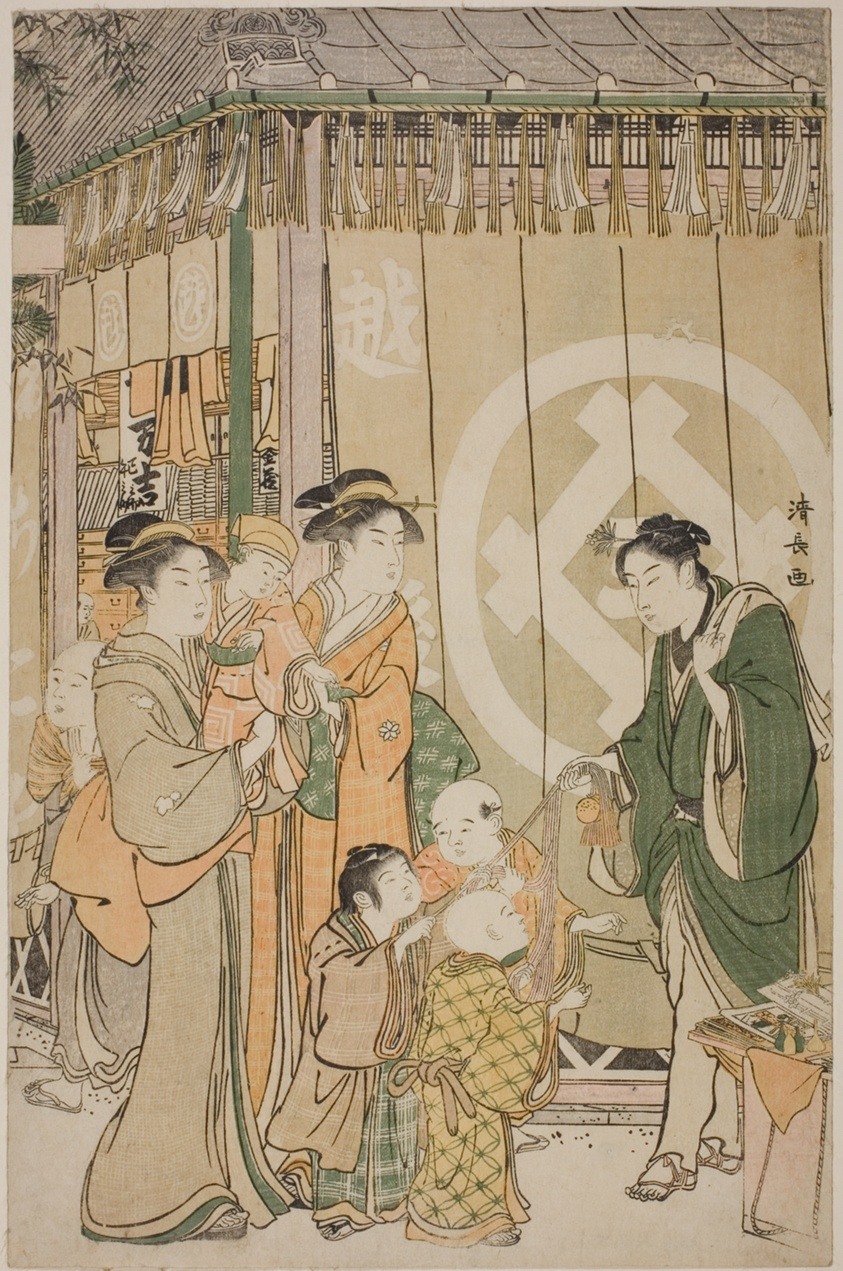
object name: Print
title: The Echigoya on New Year's Day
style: Japanese (culture or style)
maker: Torii Kiyonaga (Japanese, 1752-1815)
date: c. 1789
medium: Color woodblock print; right sheet of oban triptych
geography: Japan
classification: woodblock print; print; asian art